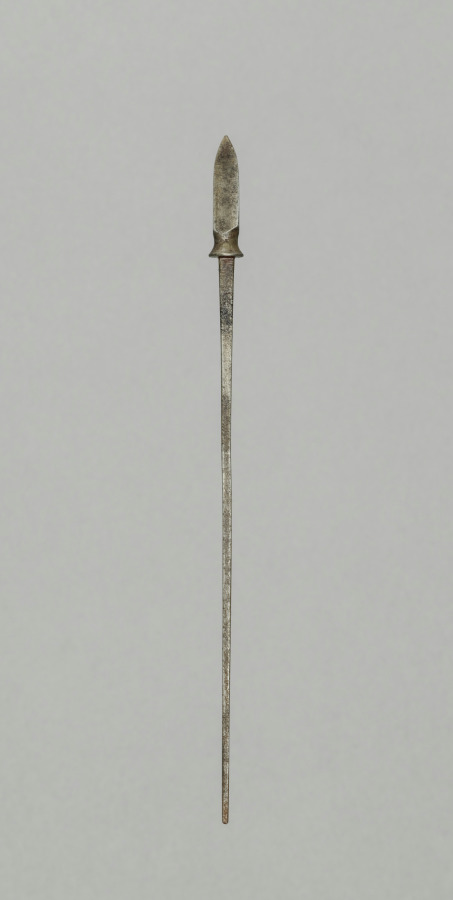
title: Arrow Point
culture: Japan, Edo period (1615–1868)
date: 1700s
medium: steel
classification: Arms and Armor